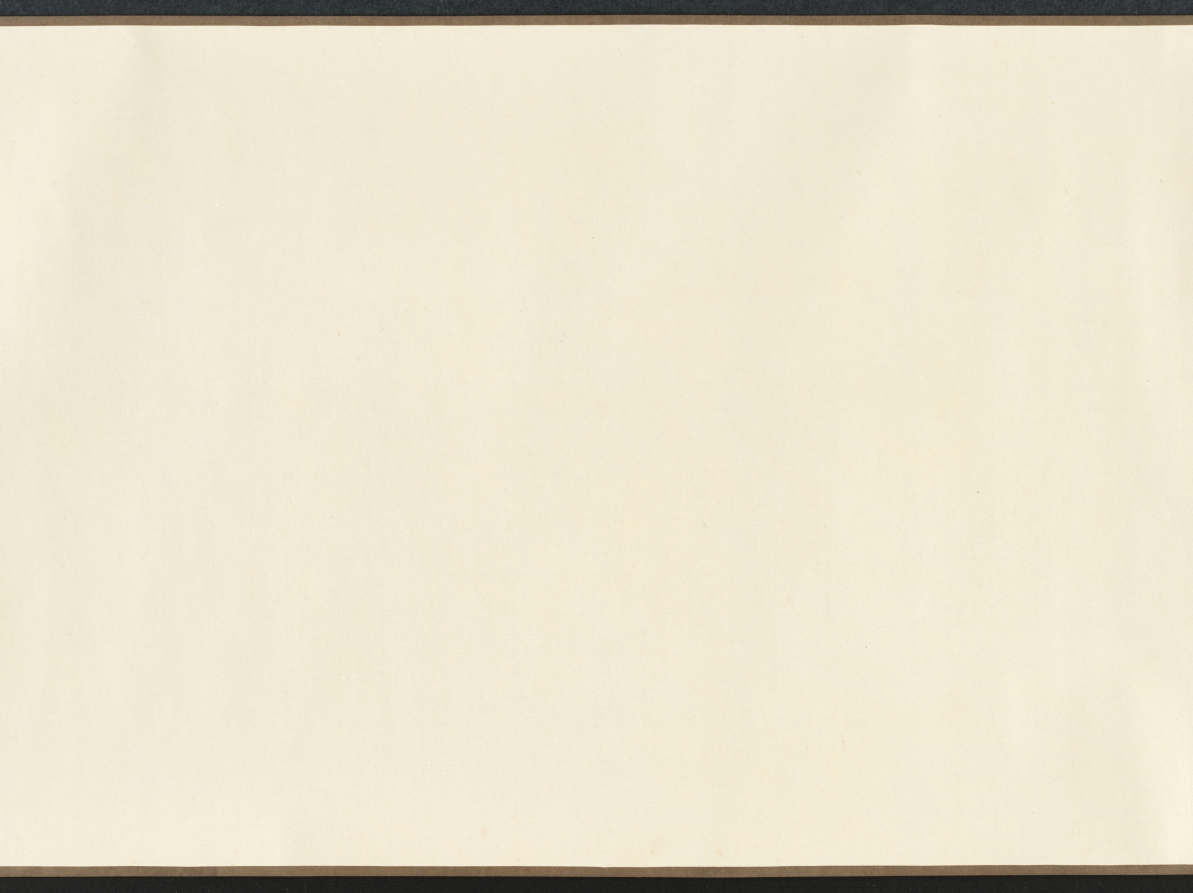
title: Ink Flowers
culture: China, Yuan dynasty (1271-1368)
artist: Zhao Zhong (Chinese, second half of the 1300s)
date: 1361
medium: Handscroll; ink on paper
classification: Painting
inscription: 寶帶同心結，香羅合歡扇。/ 繡作錦鴛鴦，雙雙為君獻。/ 薔薇露灑熏籠衣，馨香奉君君勿違。 原初并題。 [印] 趙衷原初畫記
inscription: 翠袂素羅韈，玉臺黃金盃。浩歌渡弱水。天風卷海三山開，麻姑方平為招飲，蛟宮獻舞銀濤堆。 原初并題。 [印] 雲林清趣、[印] 趙衷原初畫記。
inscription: 右用湯叔雅慶元中所寫墨花法作此卷，又效李長吉體賦詩以題之。詩與畫雖未工，要皆出於古人之餘，譬猶欲成方圓而必求其規矩之用也，識者毋誚焉！至正辛丑八月望日，東吳野人趙衷原初謹識。 [印] 趙原初、[印] 傳世清玩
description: Zhao Zhong's flowers, each paired with a poem, echo the fine-style colored flowers of the academic tradition, but instead he used only ink. Fine lines define the contours of each plant, as well as the veins within each petal and leaf. Careful ink washes give subtle modeling to the forms. The combination of lily, narcissus, and peony is unusual as the three belong to no known seasonal or symbolic system popular in the fourteenth century. Zhao’s medical training may have influenced the selection. Powdered lilies, for example, were prescribed to dispel grief, while the bark of tree peony roots was used as a treatment for various blood disorders.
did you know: This handscroll is a very rare example of ink flowers in the linear baimiao style of the fourteenth century.